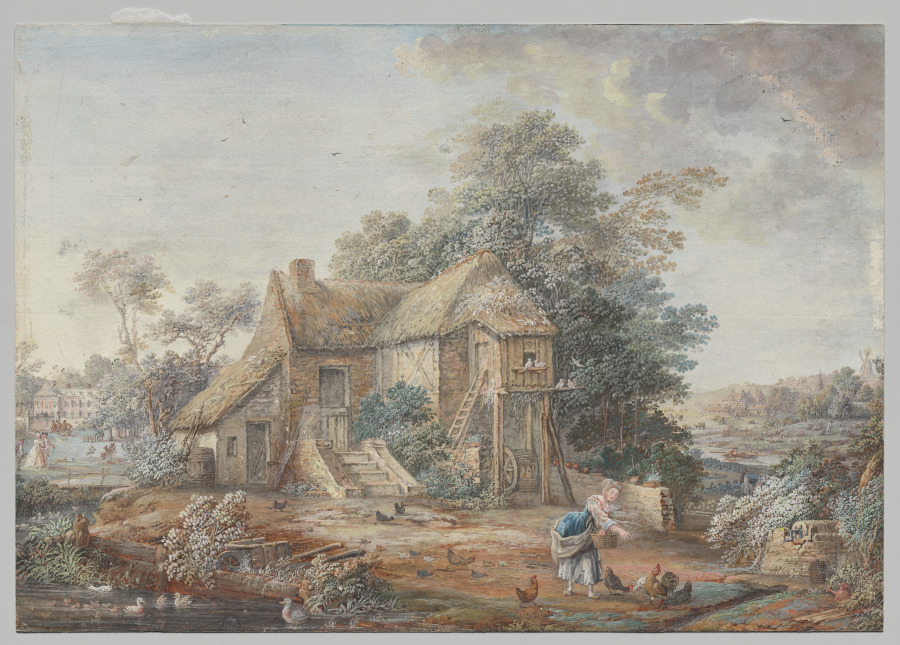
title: Le Petit Trianon, Versailles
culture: France, 18th century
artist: Louis-Nicolas van Blarenberghe (French, 1716–1812)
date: 1700s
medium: Gouache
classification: Drawing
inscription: verso of original backing: left, in brown ink: Le Petit Trianon, Versailles; center, in brown ink: La Maison du Seigneur; center, in brown ink: Le Moulin; lower center, encircled and written in graphite: 379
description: Van Blarenberghe’s image portrays the idyllic environs of the Petit Trianon, a small château built for King Louis XV on the grounds of the Palace of Versailles. In the foreground, a woman in fashionable dress feeds chickens, while a man in a rowboat enjoys the serenity of a nearby lake and a couple takes a peaceful stroll.